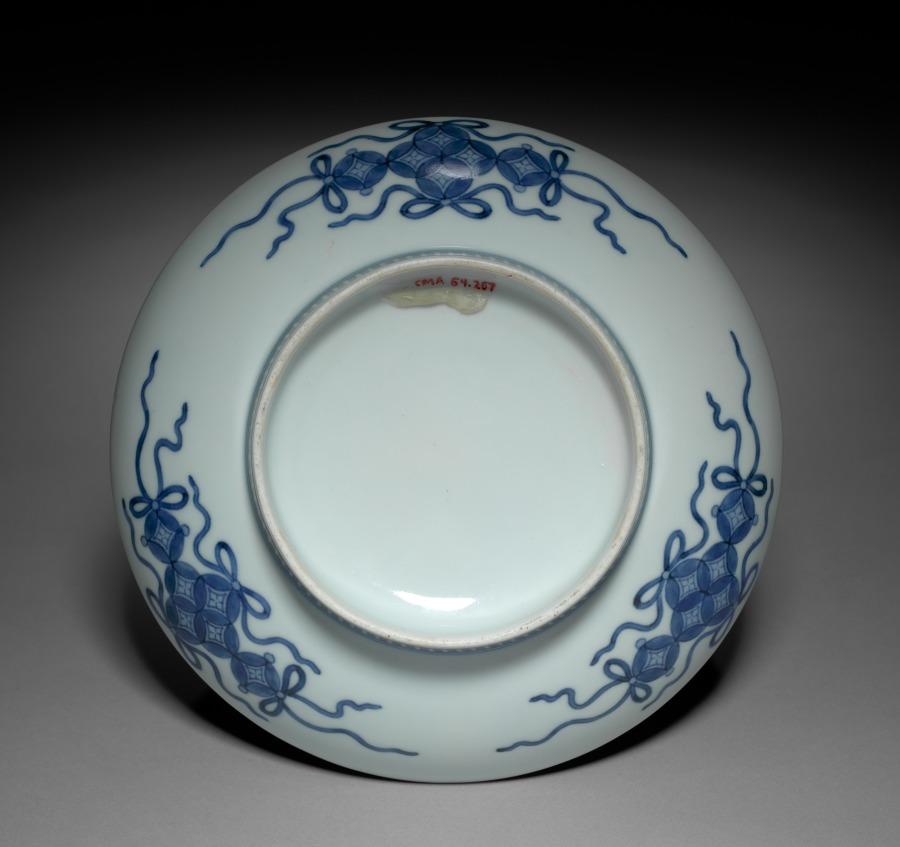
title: Dish with Camellia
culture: Japan, Edo period (1615–1868)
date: c. 1688–1716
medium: Porcelain with underglaze blue and overglaze color enamel (Hizen ware, Nabeshima type)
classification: Ceramic